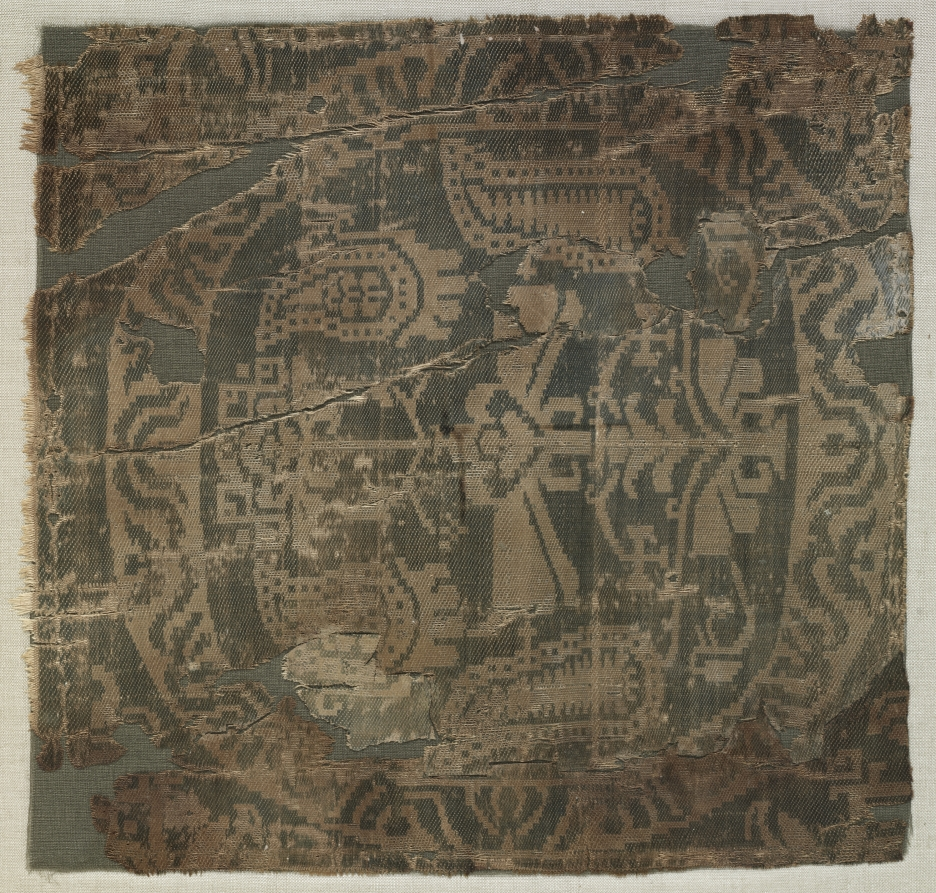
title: Roundel from a Tunic with Palmette Tree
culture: Egypt or Syria(?)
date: 650–850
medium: Silk; complementary weft-faced twill weave with inner warps (samite)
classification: Textile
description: Four or six squares of this luxurious two-color silk were originally sewn on a linen tunic, two positioned above the hemline in the front and two in the back, and possibly two more at the shoulder. The folded edges are still visible, including a silk sewing thread on the right side. The brittle condition is evident in the numerous crisp breaks.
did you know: Originally designed in Byzantine Egypt or possibly Syria, patterns like this were woven throughout a period of two to four centuries.